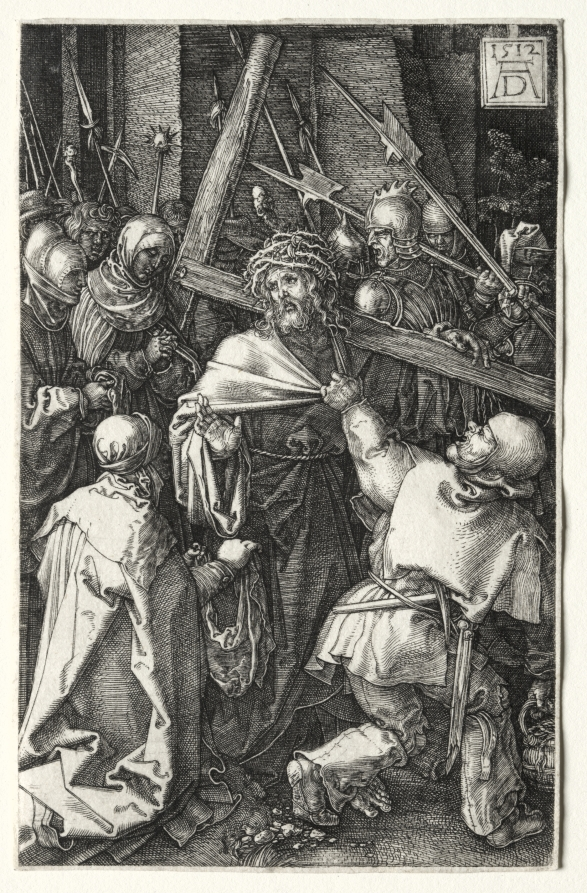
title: Christ Carrying the Cross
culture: Germany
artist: Albrecht Dürer (German, 1471–1528)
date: 1512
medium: engraving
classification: Print